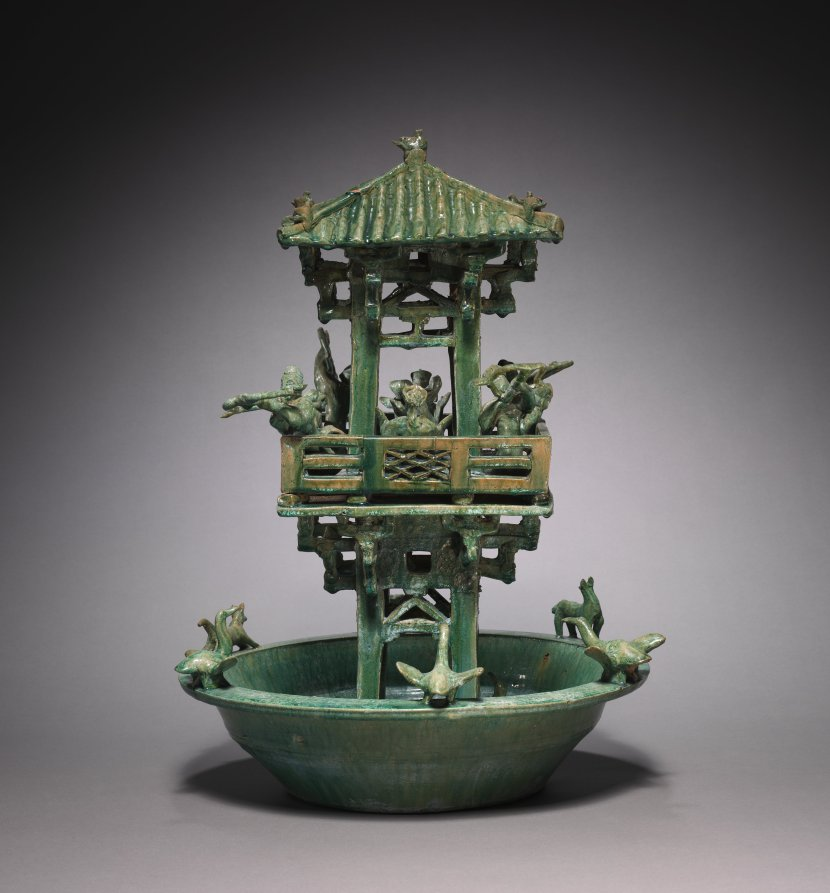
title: Watchtower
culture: China, Eastern Han dynasty (25–220 CE)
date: 25–220 CE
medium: earthenware with lead glaze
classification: Ceramic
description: In this funerary sculpture of the watchtower is a lively retinue of hunters, musicians, dancers, and domestic animals. The representation provides a vivid picture of the worldly enjoyment to be perpetuated in the otherworldly realm of the afterlife. A low-temperature lead glaze is applied to its earthenware body, enhancing the modeled forms with a brilliant, smooth coating like a layer of opaque glass.